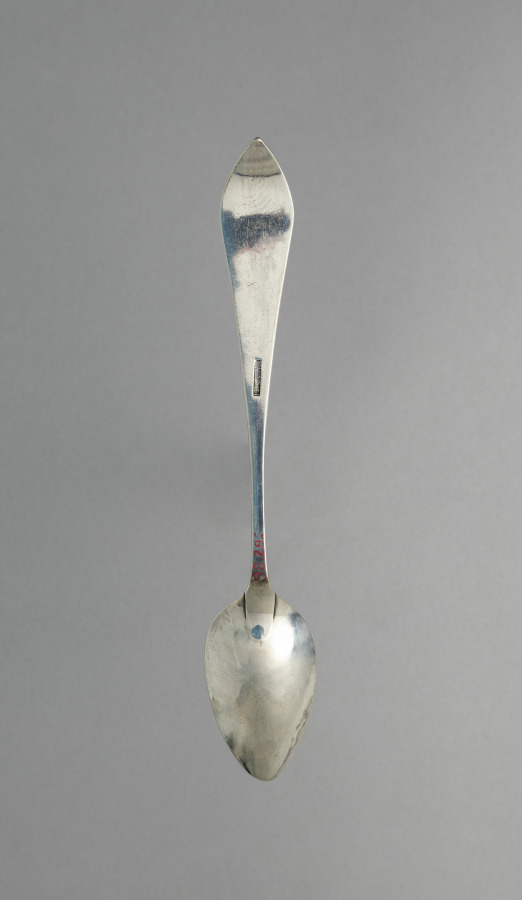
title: Teaspoon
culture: America, New Hampshire, Portsmouth, early 19th Century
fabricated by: Timothy Gerrish (American, 1749–1815)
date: 1804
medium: silver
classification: Silver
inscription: engraved "B" in bright-cut script on top of handle end.